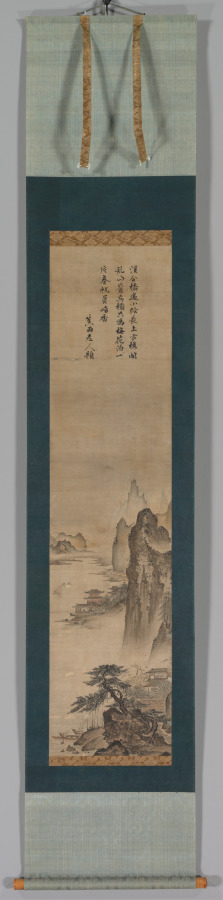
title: Landscape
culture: Japan, Muromachi period (1392–1573)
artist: attributed to Kenkō Shōkei (Japanese, active 1478–1506)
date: late 1400s–early 1500s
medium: hanging scroll, ink and light color on paper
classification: Painting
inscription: inscription above signed Shō'u Kojin; calligraphy by the Shokōji priest Tōgan Zuisen 桃源瑞仙 (1430–89)